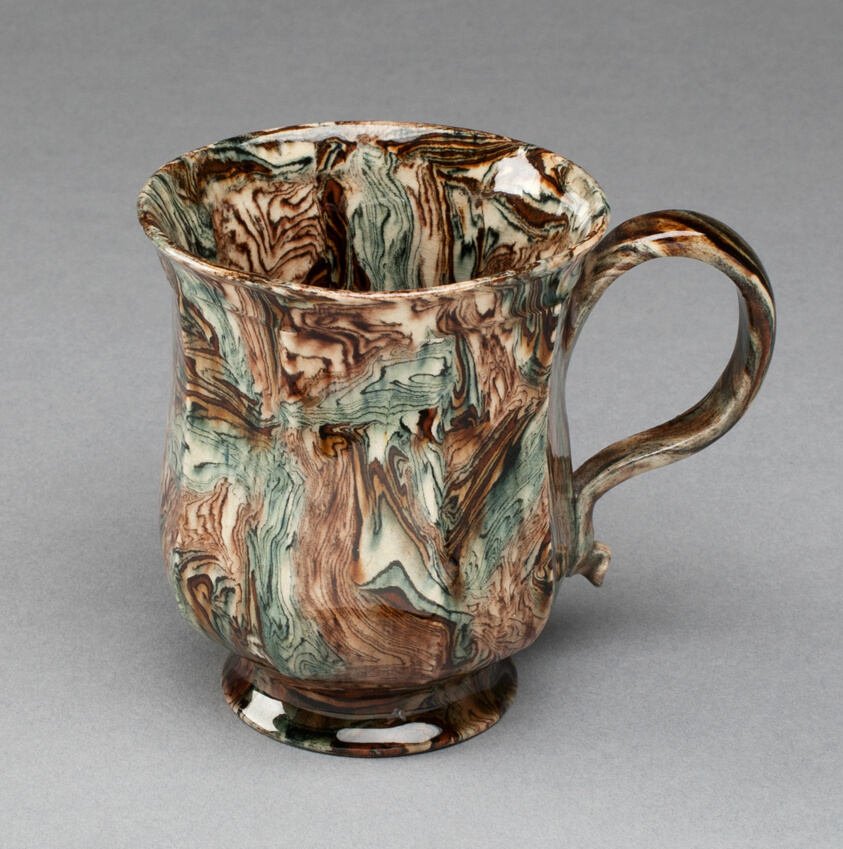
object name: Ceramics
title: Cup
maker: Staffordshire, England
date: 1750/59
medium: Lead-glazed earthenware (agateware)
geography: Staffordshire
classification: drinking vessel; lead-glazed earthenware; earthenware; agateware; ceramics; european decorative arts